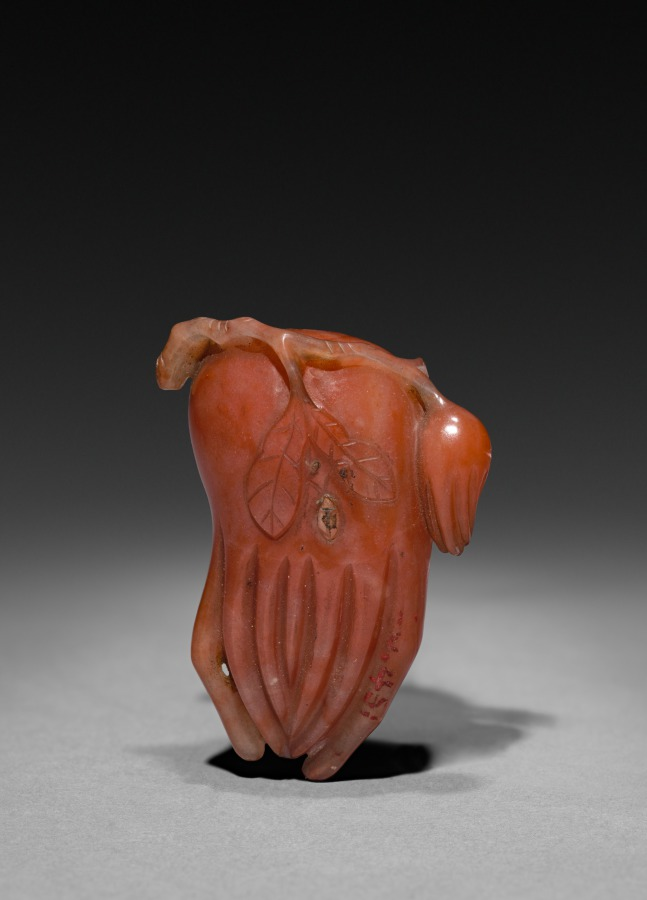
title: Snuff Bottle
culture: China, Qing dynasty (1644-1911)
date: 1644–1911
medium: glass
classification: Glass